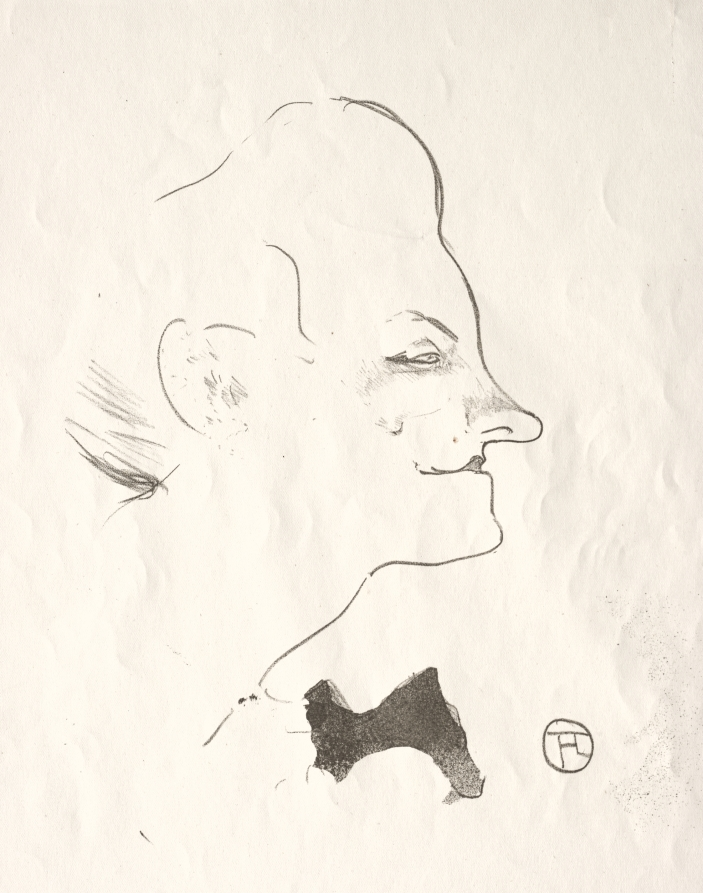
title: Le Café-concert: Yvette Guilbert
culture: France, 19th century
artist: Henri de Toulouse-Lautrec (French, 1864–1901)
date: 1893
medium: lithograph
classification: Print